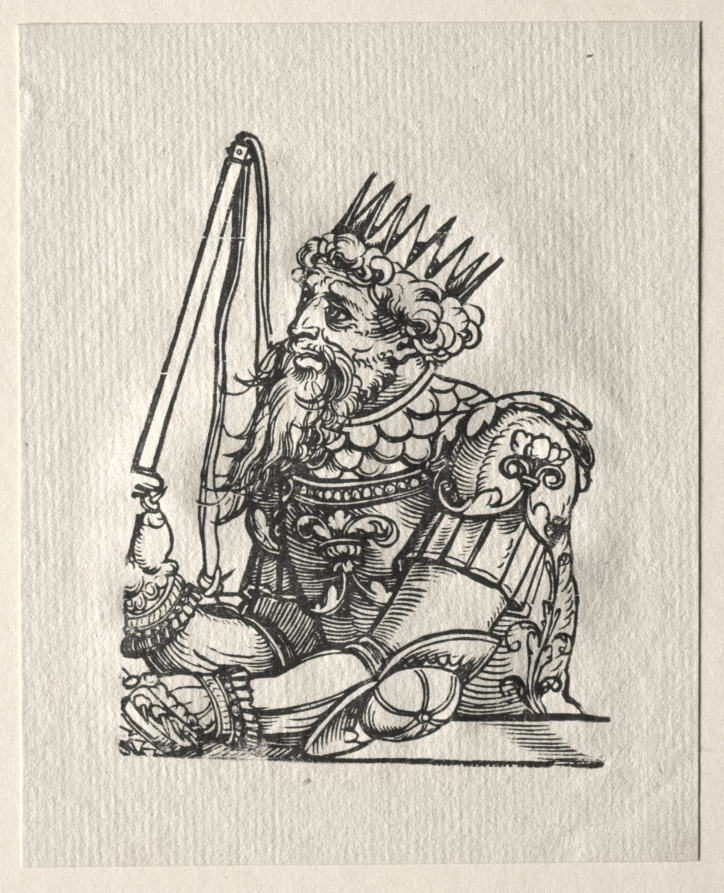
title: Tyrants of the Old Testament: Nebuchadnezzar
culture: Germany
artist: Georg Pencz (German, c. 1500–1550)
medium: woodcut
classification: Print